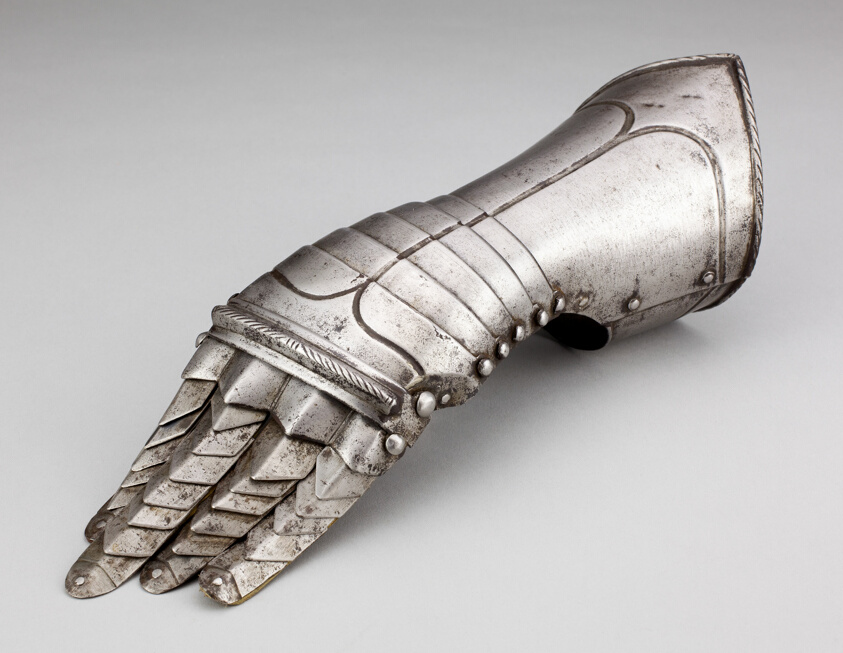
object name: Armor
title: Boy's Fingered Gauntlet for the Left Hand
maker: German, possibly Brunswick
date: c. 1560/80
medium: Steel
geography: Brunswick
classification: suit-gauntlet; armor; arms and armor